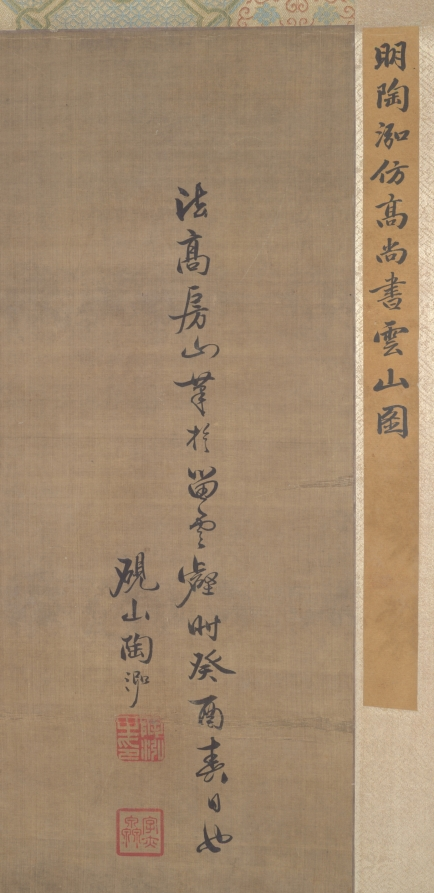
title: Clouds Visiting a Mountain Retreat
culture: China, Ming dynasty (1368–1644)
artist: Tao Hong (Chinese, active c. 1610–1640)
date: 1633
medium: Hanging scroll; ink on silk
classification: Painting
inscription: Artist's inscription, signature and two seals: Imitating Kao Fan-shan's [Kao K'o-kung's] brush at Liu-yün-ho [Valley of Lingering Clouds] during a spring day in the kuei-yu year [1633]. Yen-shan, T'ao Hung [seals] T'ao Hung chih-yin; tzu Ch'iu-shui. (Translated by Wai-Kam Ho)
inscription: 1 additional seal unidentified.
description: Little is known about Tao Hong who settled in Nanking in the latter part of his life. His son was a friend of the leading Nanjing school artist Gong Xian (on display nearby). When the Ming dynasty collapsed in 1644, Tao joined the loyalist resistance in Yunnan province. By 1645 the Manchu invaders had defeated the Yunnanese forces, prompting Tao to flee to Burma, where he died shortly thereafter. Only five of Tao Hong’s works are known to exist, of which this painting is the largest.